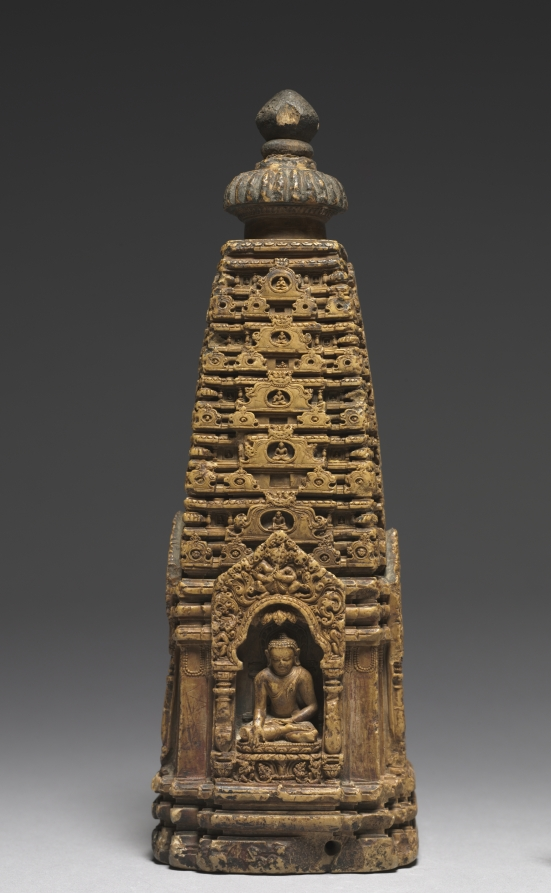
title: Portable Buddhist Temple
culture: Eastern India, Bihar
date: 900s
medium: Kaolin with traces of pigment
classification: Sculpture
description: The large niches on each side contain scenes from the life of the Buddha. The first features his mother Maya after his miraculous birth. The second and fourth depict his triumph over the forces of evil that attempted to frighten and seduce him away from the path to enlightenment. The third scene takes place after he has established a monastic following and depicts his wife bringing their son to meet him. Kaolinite is a compacted mineral that approximates ivory in its ability to be carved with fine details. Visitors to sacred Buddhist sites would commission portable sculptures such as this to commemorate their pious pilgrimage.